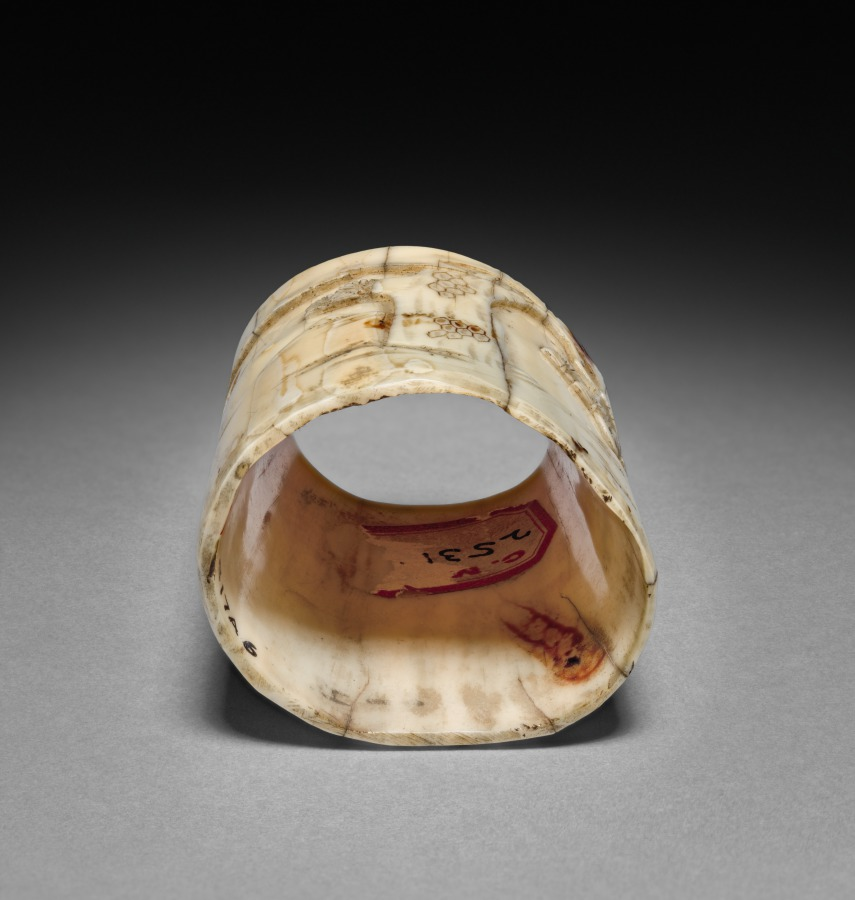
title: Carved Tusk with Chinese Immortal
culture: Japan, Meiji period (1868–1912)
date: c. 1868–1912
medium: Carved ivory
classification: Ivory